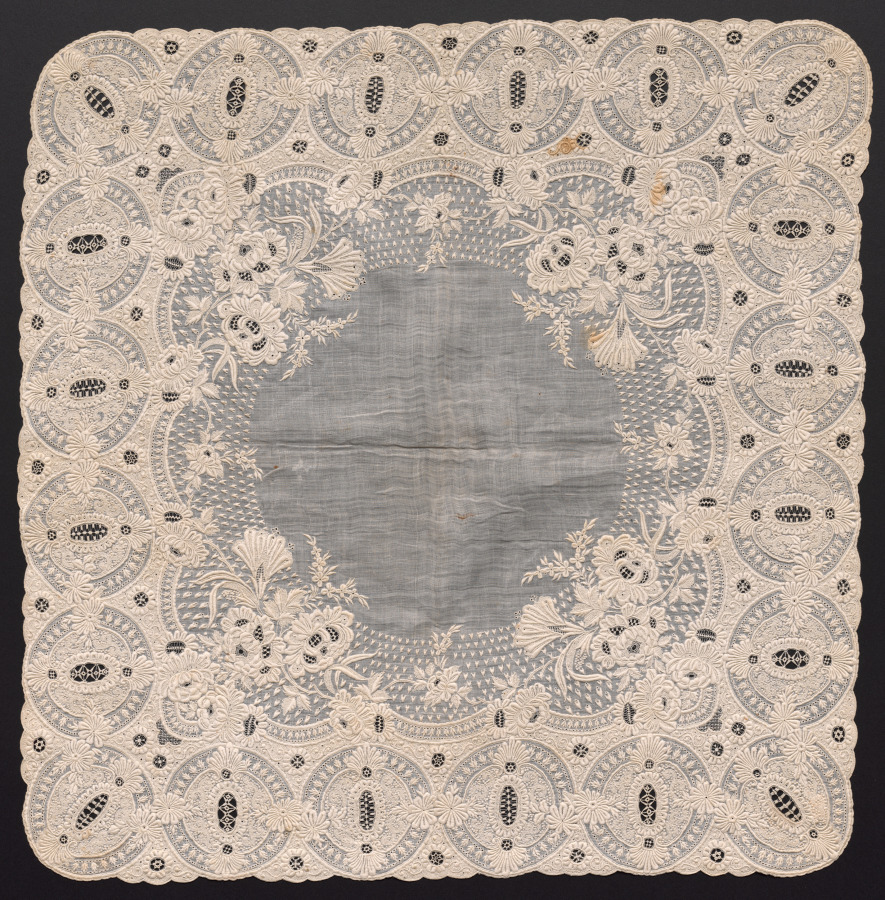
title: Lace Handkerchief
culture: France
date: 1800s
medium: Plain weave linen center: linen embroidery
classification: Embroidery